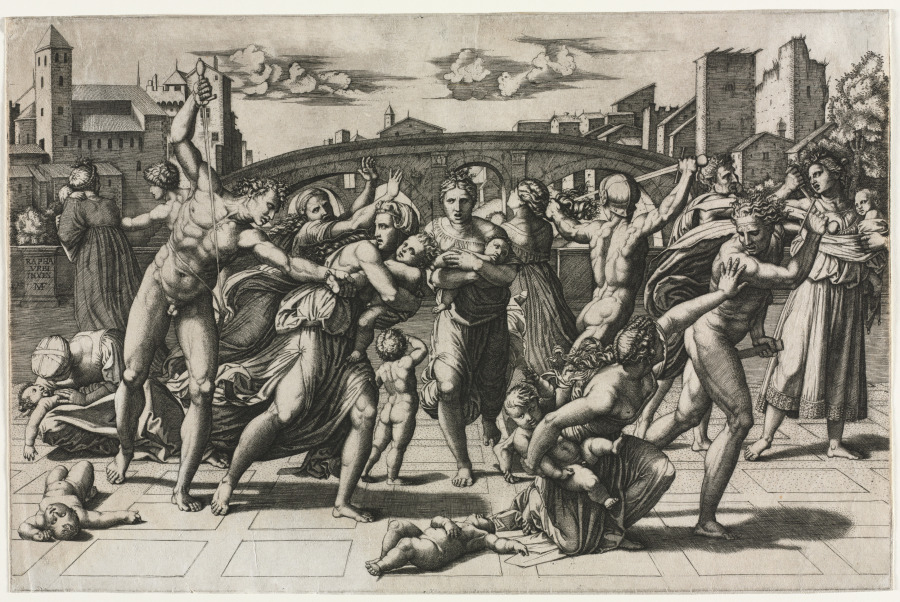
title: The Massacre of the Innocents (Without the Fir Tree)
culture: Italy, 16th century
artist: Marcantonio Raimondi (Italian, 1470/82–1527/34)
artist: after Raphael (Italian, 1483–1520)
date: about 1511–12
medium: engraving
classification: Print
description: Raphael drew this composition to be engraved by Marcantonio Raimondi while working in the Vatican apartments adjacent to Michelangelo, who was then painting the Sistine Chapel ceiling. The emotive scene portrays a moment from the biblical Book of Matthew when King Herod, hearing of the birth of a savior, ordered the execution of all male children under two years of age. Known for the clarity and balance of his forms and compositions, the younger Raphael may have found inspiration for this composition in Michelangelo’s narrative intensity and active, twisting nude forms.